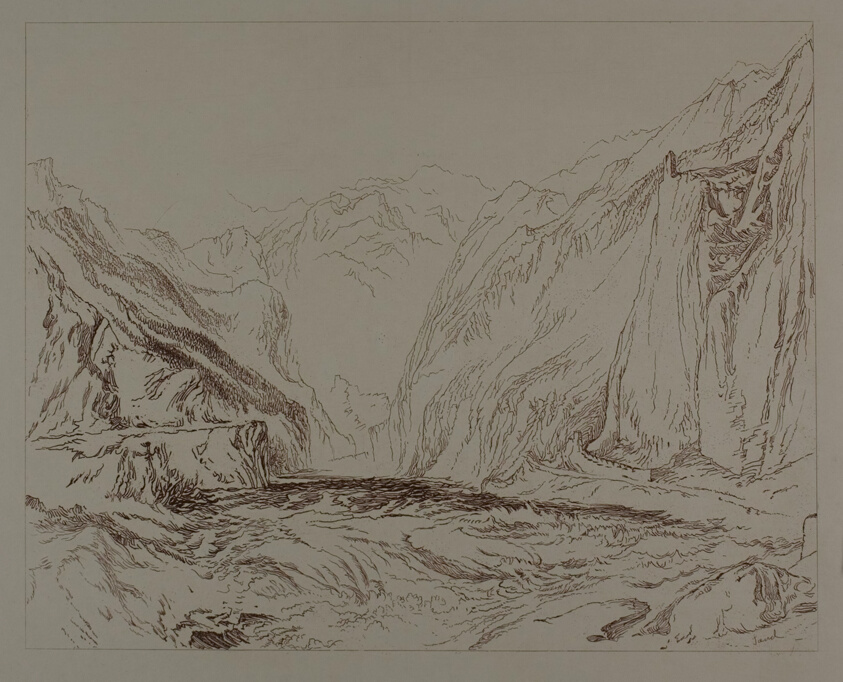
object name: Print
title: Sand Mountain Scene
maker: John Ruskin (English, 1819-1900)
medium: Etching on paper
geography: England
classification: etching; print; prints and drawing